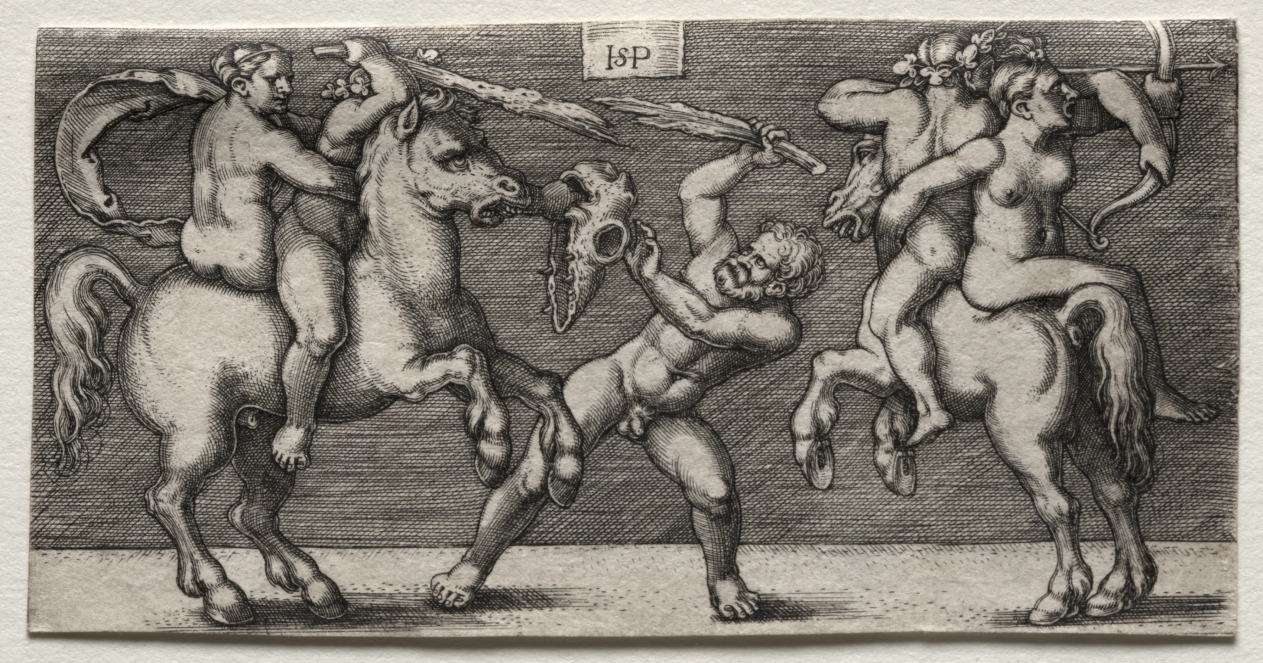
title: Combat of Three Men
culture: Germany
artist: Hans Sebald Beham (German, 1500–1550)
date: 1546–1547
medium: engraving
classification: Print